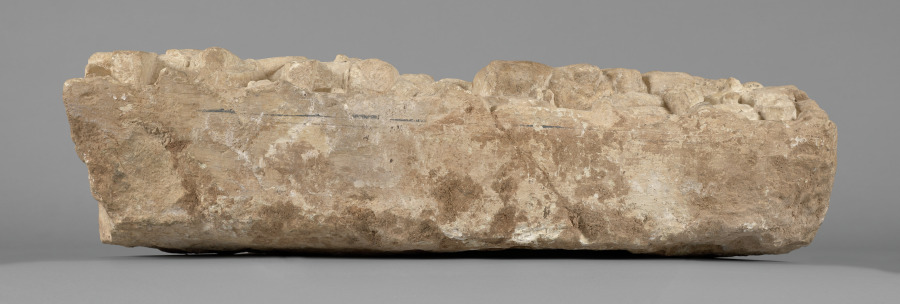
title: Procession of Nobles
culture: Syria, Palmyra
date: 100–150 CE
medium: limestone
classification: Sculpture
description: Palmyra was a key center for trade between the Roman and Parthian Empires. This unique relief has been associated with Palmyra only through stylistic comparisons; it is not known where it was found on the site. It depicts men in Parthian dress riding Arabian horses with bejeweled harness trappings ahead of riders on camels—a possible reference to the caravans that made Palmyra so wealthy. Although all of the riders are dressed and equipped as Parthians, the proportions and perspective of the scene seem to be informed by Greco-Roman conventions. It may depict a ceremonial procession.